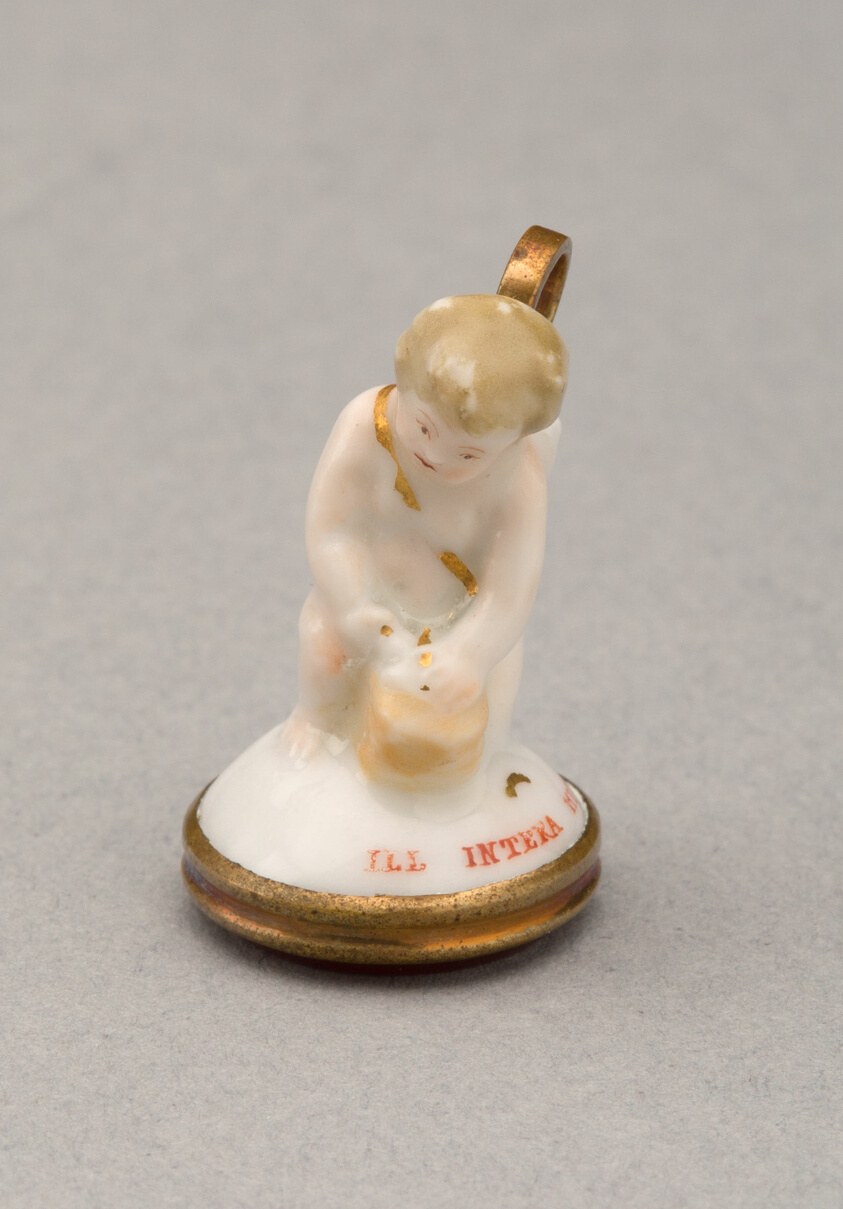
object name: Ceramics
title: Seal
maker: Chelsea Porcelain Manufactory; London, England, c. 1745-1784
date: 1750/70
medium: Soft-paste porcelain, polychrome enamels and gilding; hardstone and metal mount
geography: Chelsea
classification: porcelain; ceramics; european decorative arts